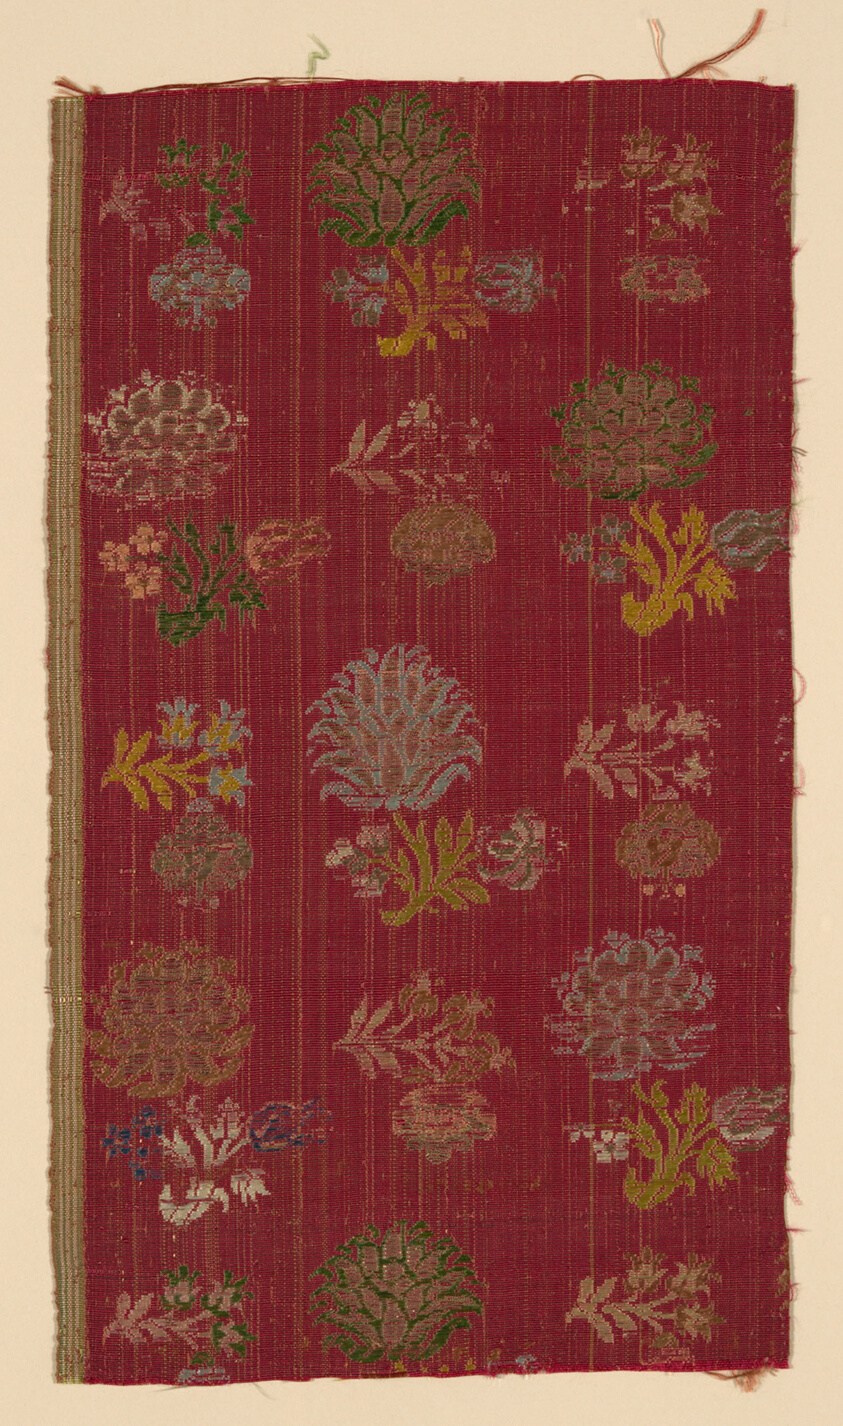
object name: Textile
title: Fragment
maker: Italy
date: 1625/75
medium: Silk, brocade plain compound cloth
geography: Italy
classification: textile; weaving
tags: flowers